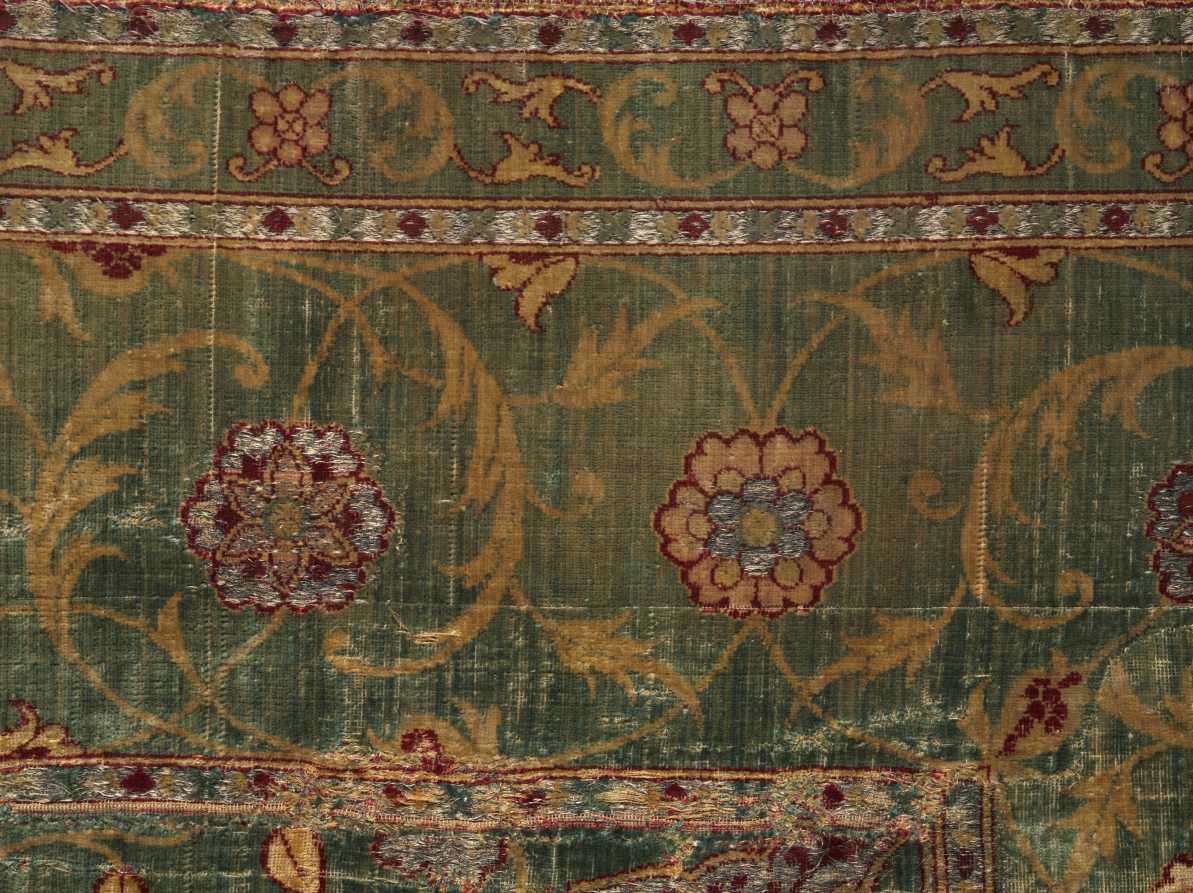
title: Fragment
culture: India, 17th century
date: 1600s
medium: velvet (brocaded); silk and metal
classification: Velvet